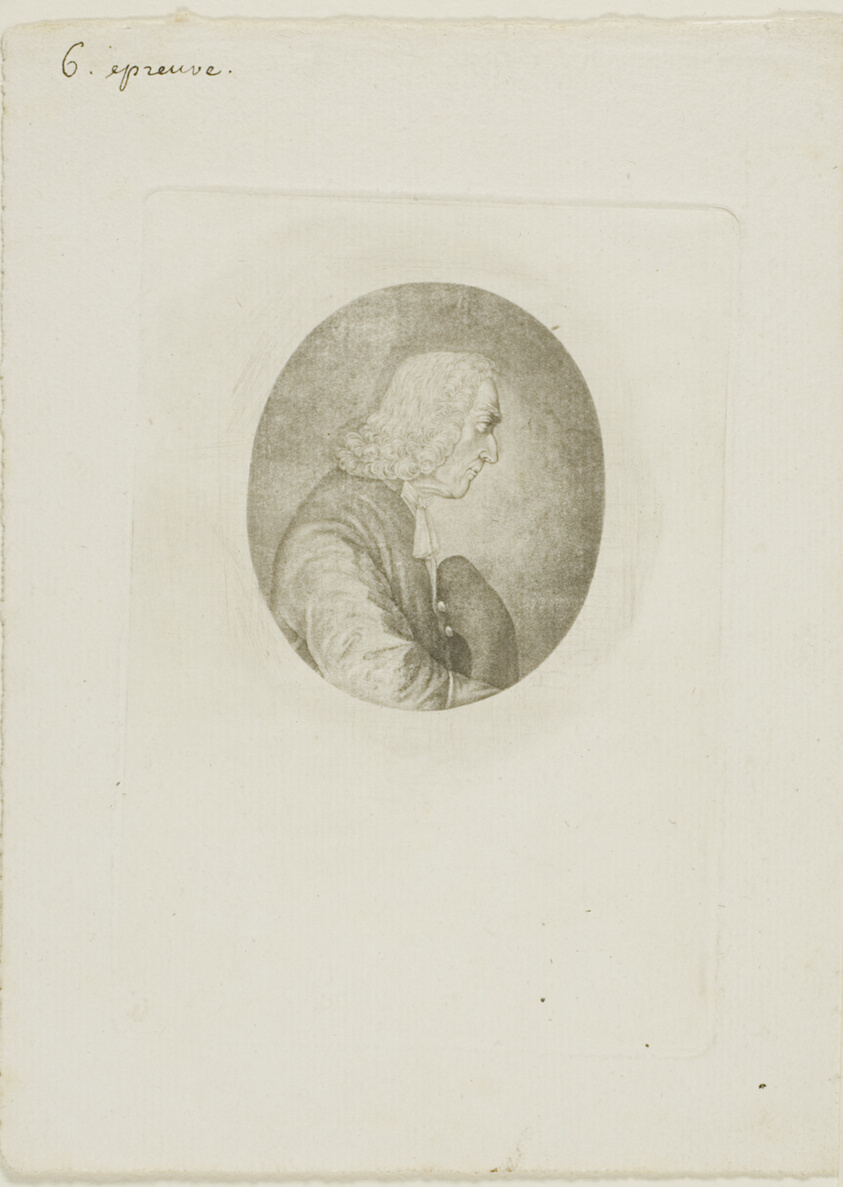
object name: Print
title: Jean Joseph Grateloup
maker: Jean-Baptiste de Grateloup (French, 1735-1817); Jean Pierre Sylvestre (French)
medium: Engraving on paper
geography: France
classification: aquatint; print; prints and drawing